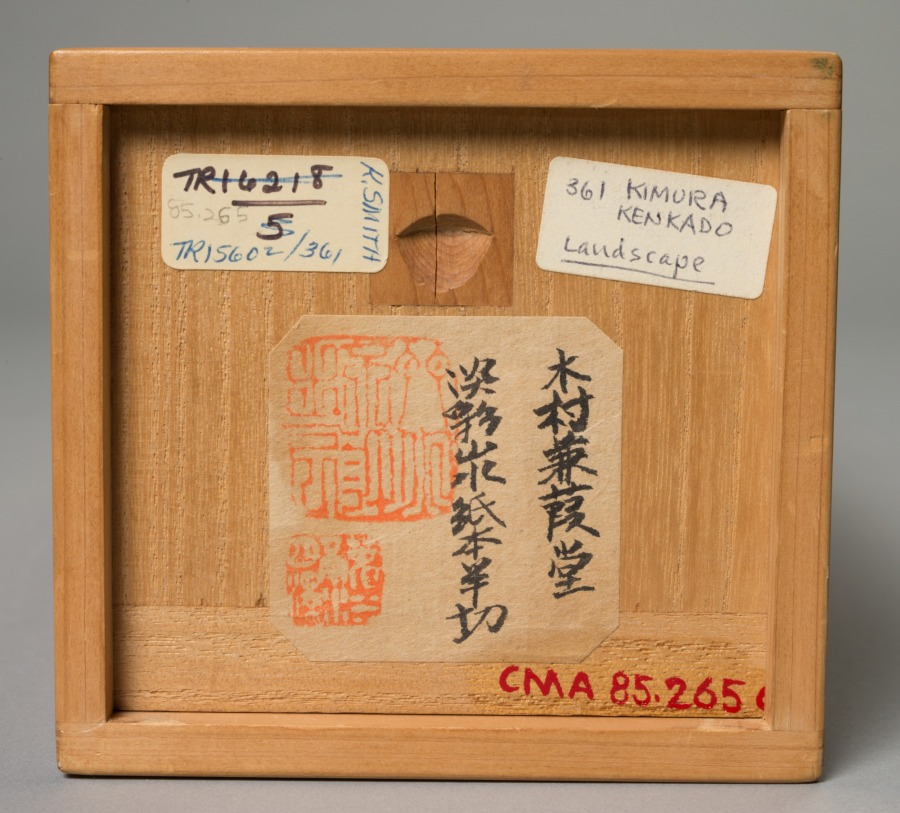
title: Landscape with Boaters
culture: Japan, Edo period (1615–1868)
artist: Kimura Kenkadō (Japanese, 1736–1802)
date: late 1700s–early 1800s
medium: hanging scroll; ink and slight color on paper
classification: Painting